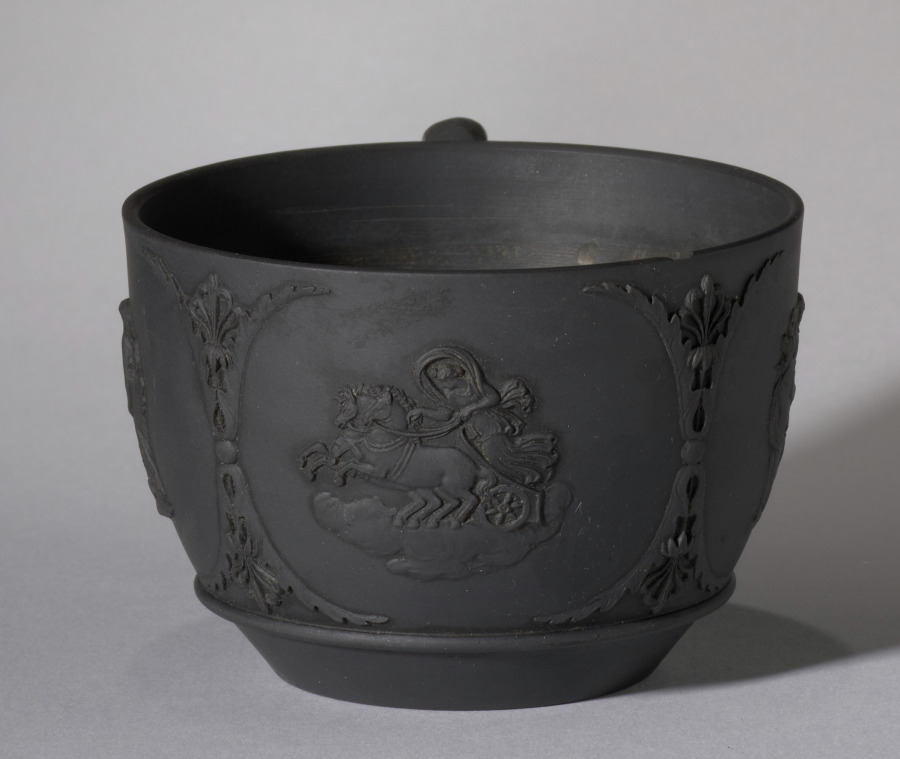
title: Cup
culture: England, Staffordshire, 19th century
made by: Wedgwood Factory (British)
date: 1800s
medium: black basalt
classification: Ceramic